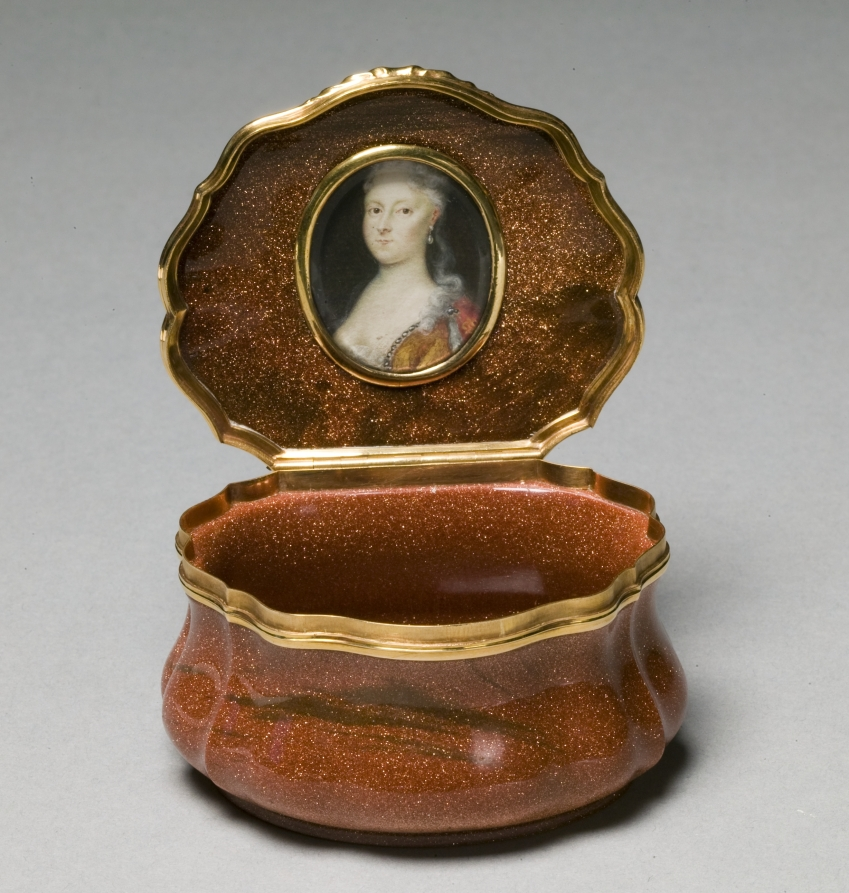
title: Snuff Box with Portrait of Maria Anne Sophia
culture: Germany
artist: attributed to Frederik Fabritius (German, 1685–1755)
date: c. 1730–60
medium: averturine, gold, enamel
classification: Miscellaneous